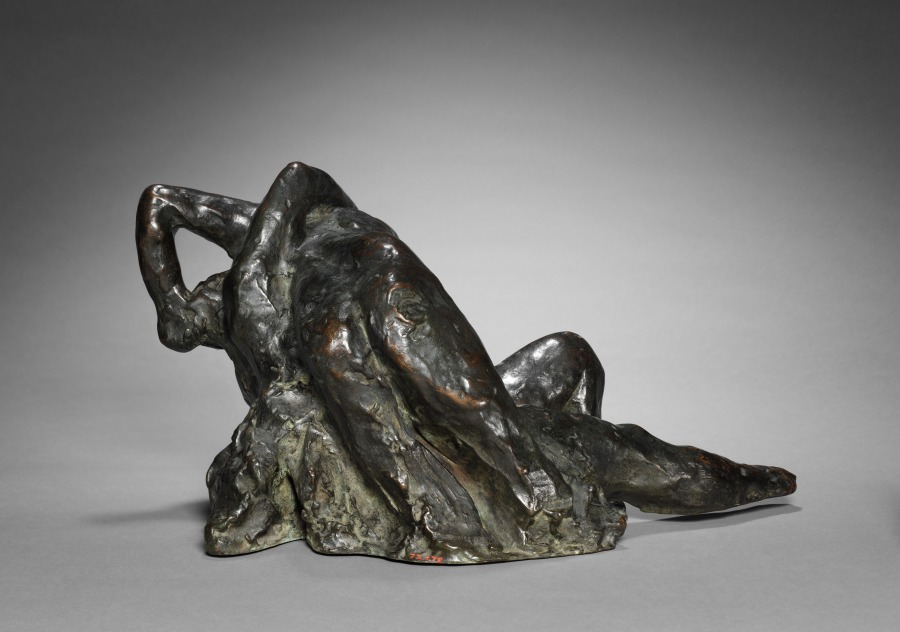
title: Les Damnées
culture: France, 19th century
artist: Auguste Rodin (French, 1840–1917)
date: 1885–1895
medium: bronze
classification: Sculpture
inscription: Signed front bottom right: "A. Rodin"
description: Rodin derived this couple, whose twisted bodies are locked painfully together, from the naked figures writhing in agony in his monumental sculpture The Gates of Hell.